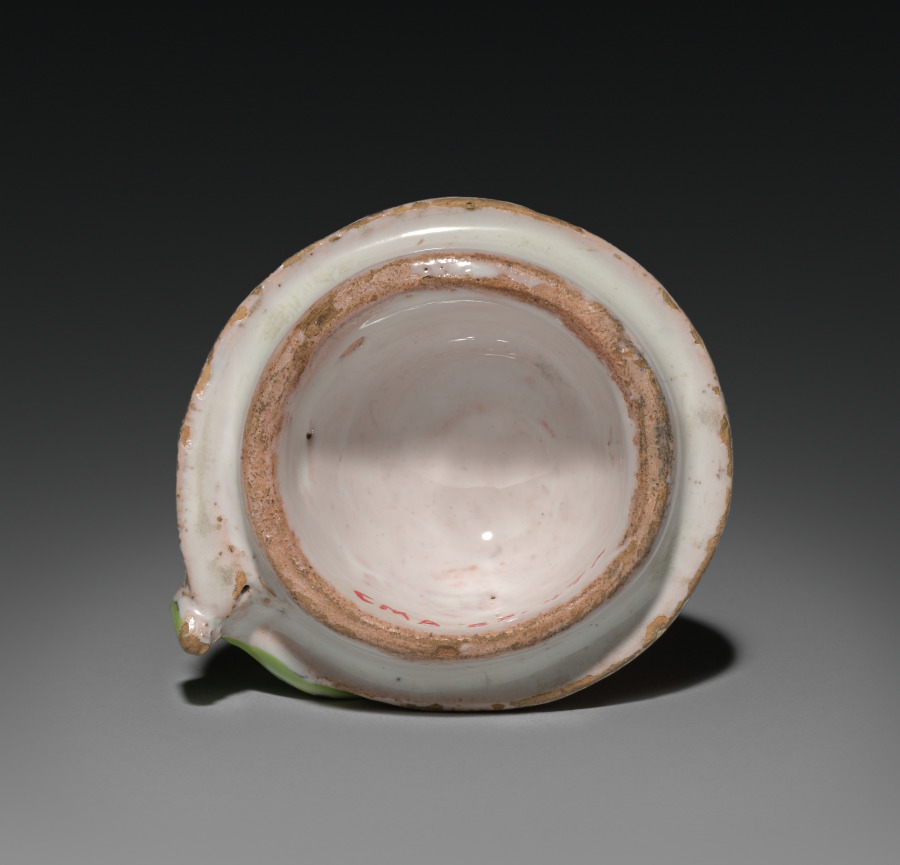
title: Cover for a Box in the Form of a Snail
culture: France, 18th century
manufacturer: Strasbourg Factory (France)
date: c. 1750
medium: faience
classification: Ceramic